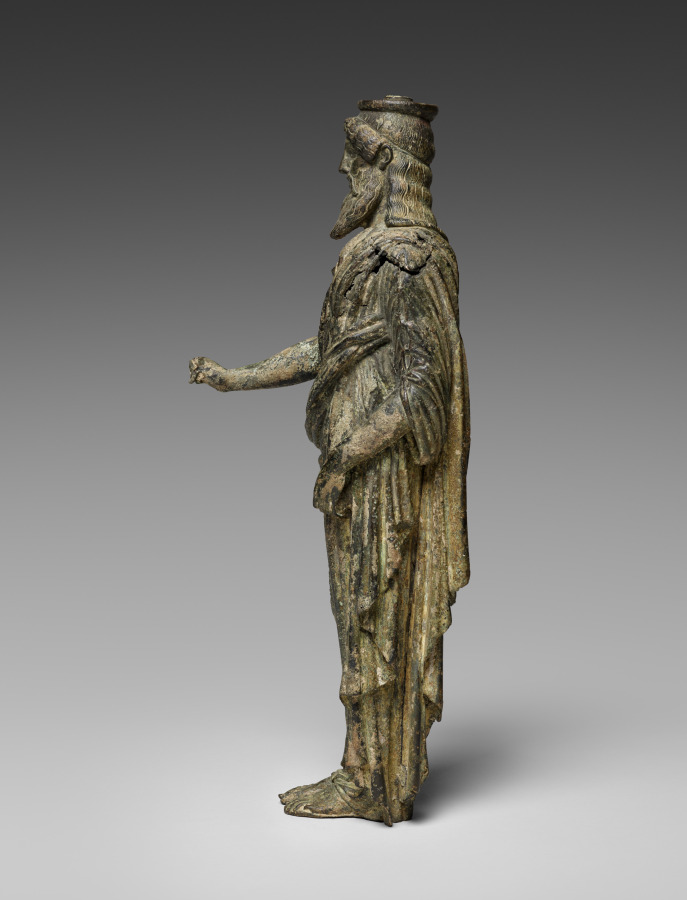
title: Statuette of Dionysos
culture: Italy, Roman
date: 50 BCE–50 CE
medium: bronze and silver and traces of gilding, hollow cast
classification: Sculpture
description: This bronze figure of Dionysos, the god of wine, theater, and the mysteries, is presented in a style recalling Archaic Greek art, most noticeably in his stiff pose and trimmed beard. The more naturalistic folds of his garment speak to a later date, in the Roman period. The disk attached at the top of the head suggests that this figure was once part of an ornate piece of furniture, perhaps a stand or support. In his right hand, the god likely held a kantharos or other attribute. He would have been further embellished with inlaid copper (lips), silver (whites of eyes), and perhaps gilding (garment).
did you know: Over his long, thin garment, Dionysos wears an animal skin, fastened on his left shoulder.